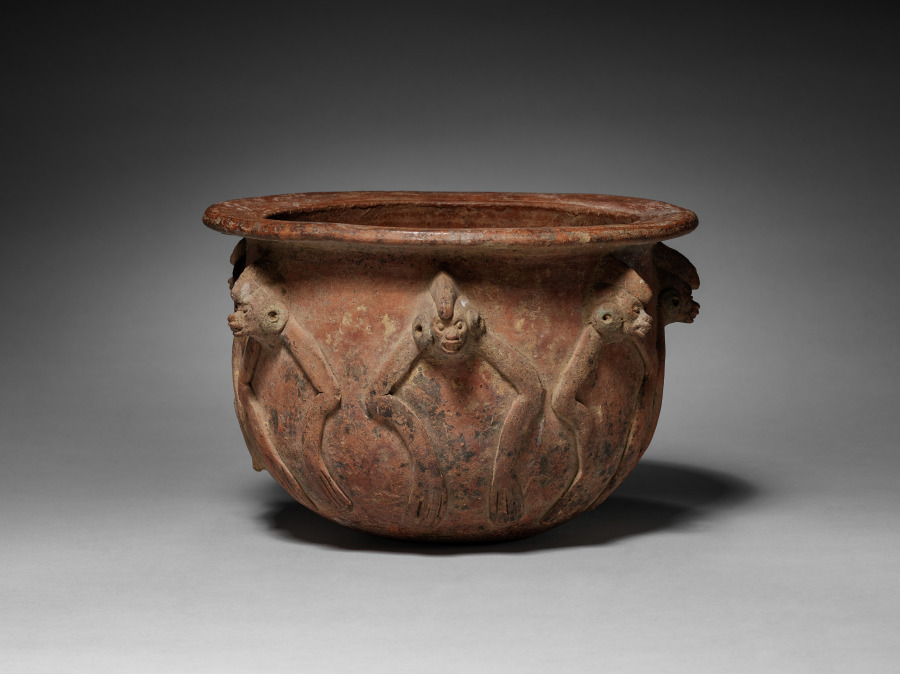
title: Incense Burner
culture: Guatemala, Quiché, San Juan Cotzal, Maya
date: 600–1000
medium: pottery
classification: Ceramic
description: According to the Popol Vuh, a sixteenth-century Quiché Maya manuscript, the world has been created and destroyed twice, and we now live in the third creation. In the second creation, human beings were made from wood and reeds. They lacked souls and minds, and they did not revere their creator. Because of these imperfections, most were killed by an uprising of utensils and domestic animals. Monkeys are the descendents of the survivors.